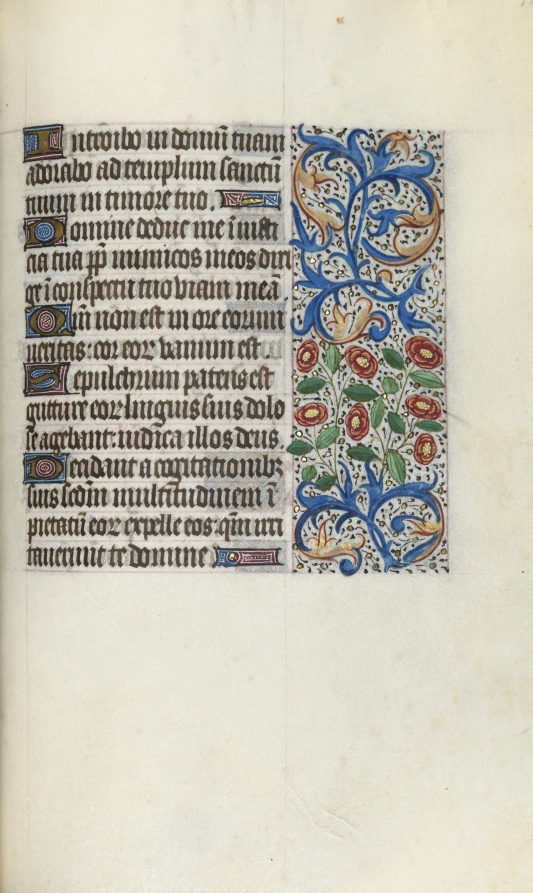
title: Book of Hours (Use of Rouen): fol. 111r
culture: France, Rouen, 15th century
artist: Master of the Geneva Latini (French, active Rouen, 1460–80)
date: c. 1470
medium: ink, tempera, and gold on vellum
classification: Bound Volume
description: In the late 1400s and early 1500s Rouen was an established and important center of book production. The city’s cathedral had a wealthy chapter that spent large sums of money to commission books and to maintain its extensive library. The stationers and booksellers would have likely been concentrated in or near the cathedral precinct. This artist, named after a manuscript now in Geneva, was Rouen’s principal illuminator during the second half of the 1400s.